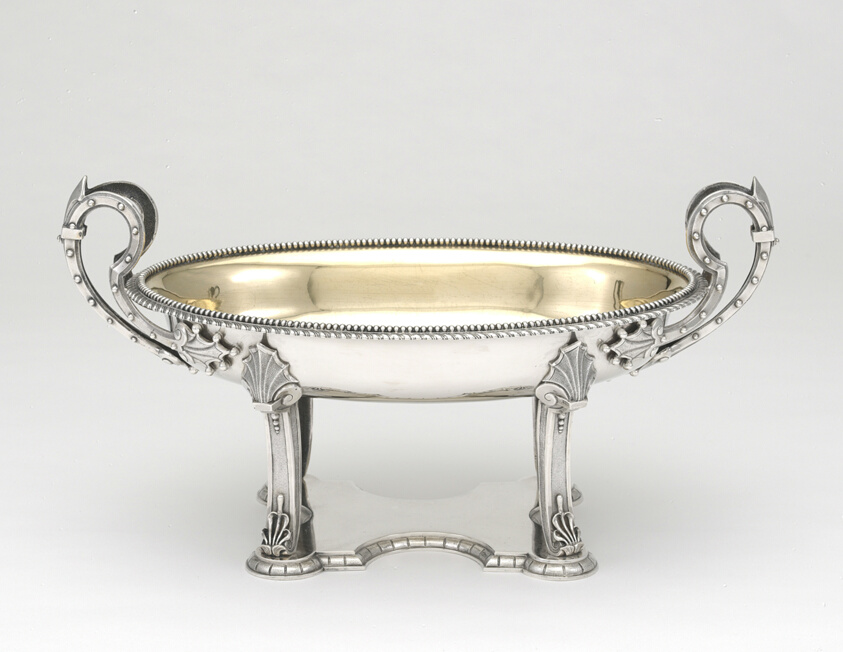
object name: Metalwork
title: Compote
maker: Peter L. Krider; American, 1821–1895; Philadelphia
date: 1866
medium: Silver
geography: Philadelphia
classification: compote; silver; american decorative arts; american arts; decorative arts